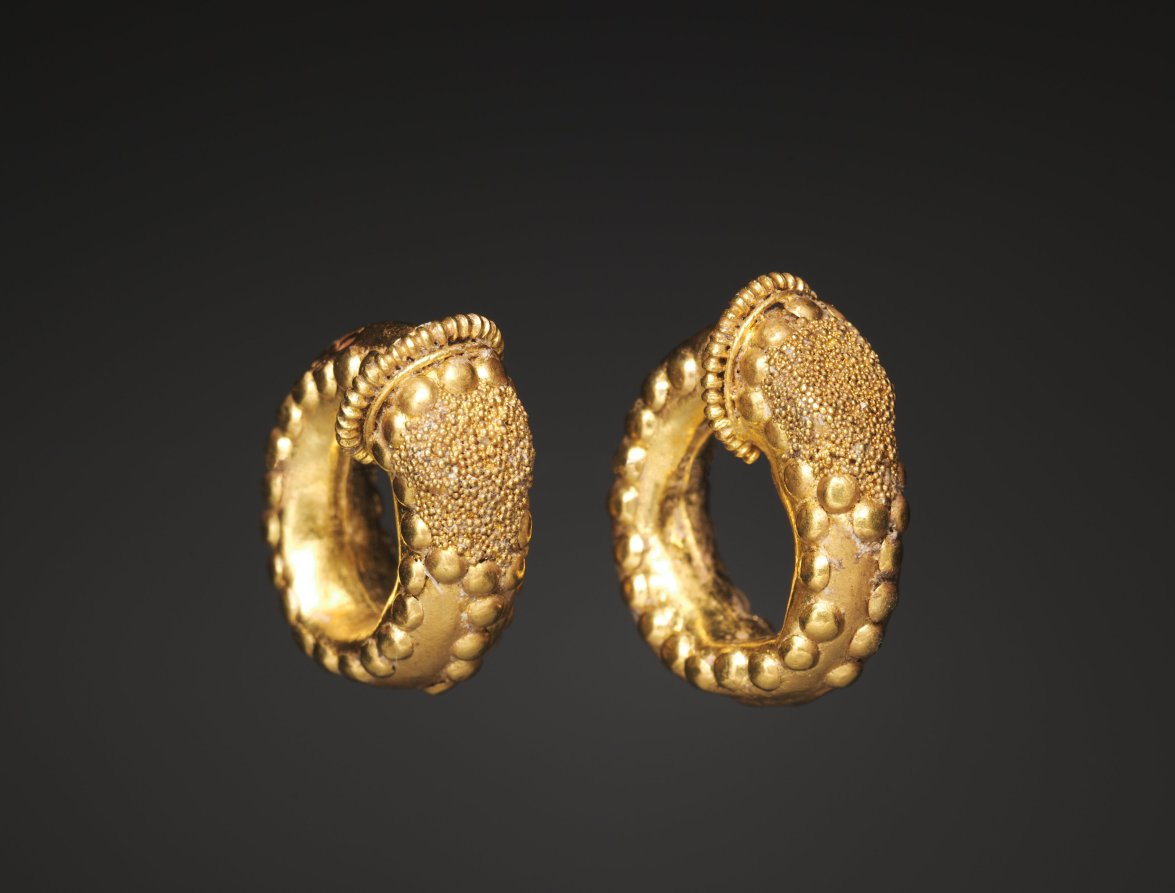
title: Pair of Earrings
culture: Etruscan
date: 300s BCE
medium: gold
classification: Jewelry